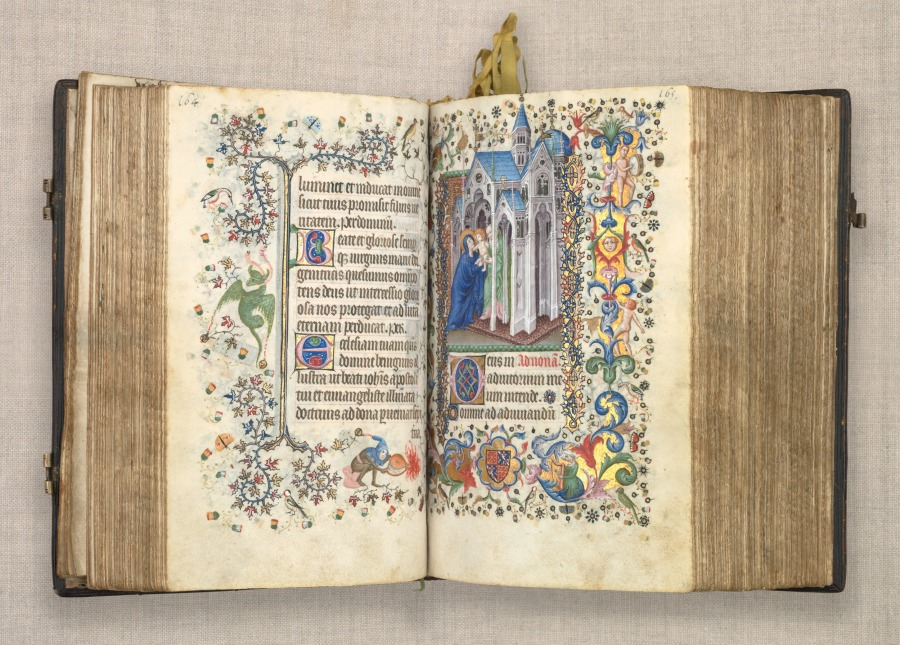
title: Hours of Charles the Noble, King of Navarre (1361-1425): fol. 82vr, Presentation in the Temple (Nones)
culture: France, Paris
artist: Master of the Brussels Initials and Associates (French)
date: c. 1405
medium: ink, tempera, and gold on vellum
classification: Bound Volume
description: This precious volume was obviously highly prized by its owner, the French-born King of Navarre, who had his coat of arms painted on no less than 20 folios. Rather than directly commissioning this manuscript from a specific workshop, it seems that Charles the Noble acquired his book of hours—perhaps ready-made for the luxury market—while on a trip to Paris in 1404–5. A collaborative effort, it contains six painting styles within its pages, those of two Italians, two Frenchmen, and two Netherlanders. The painter who was responsible for the planning and decoration of the book, and who produced 17 of the large miniatures, was a Bolognese artist known as the Master of the Brussels Initials. His principal assistant, responsible for most of the borders, was a Florentine who signed his name "Zecho" da Firenze on folio 208 verso.